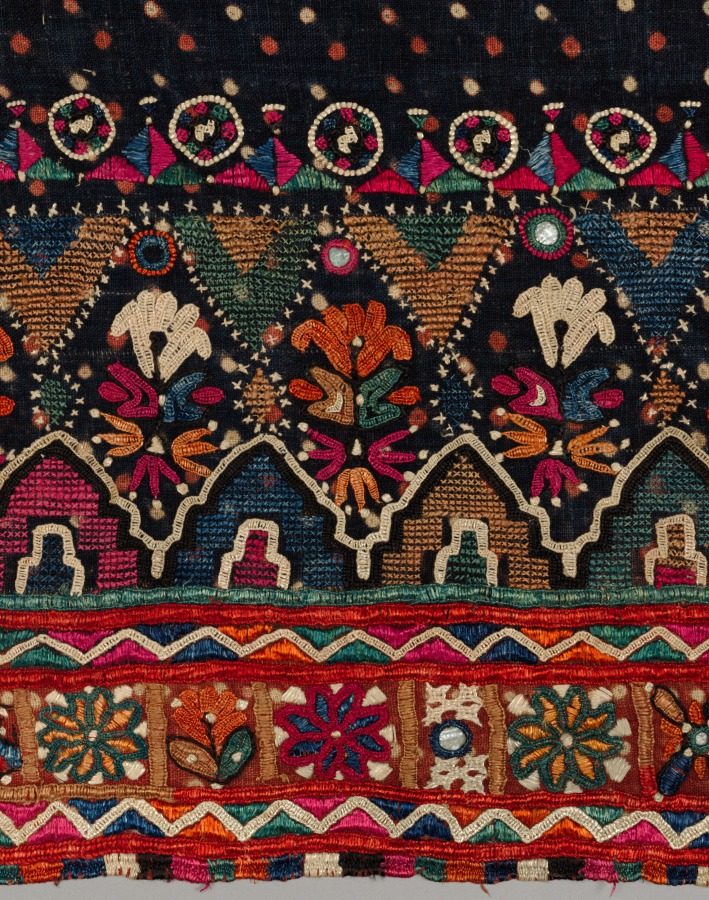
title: Shawl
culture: India, Kathiawar, 19th century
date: 1800s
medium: embroidery: silk on cotton tabby ground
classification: Embroidery